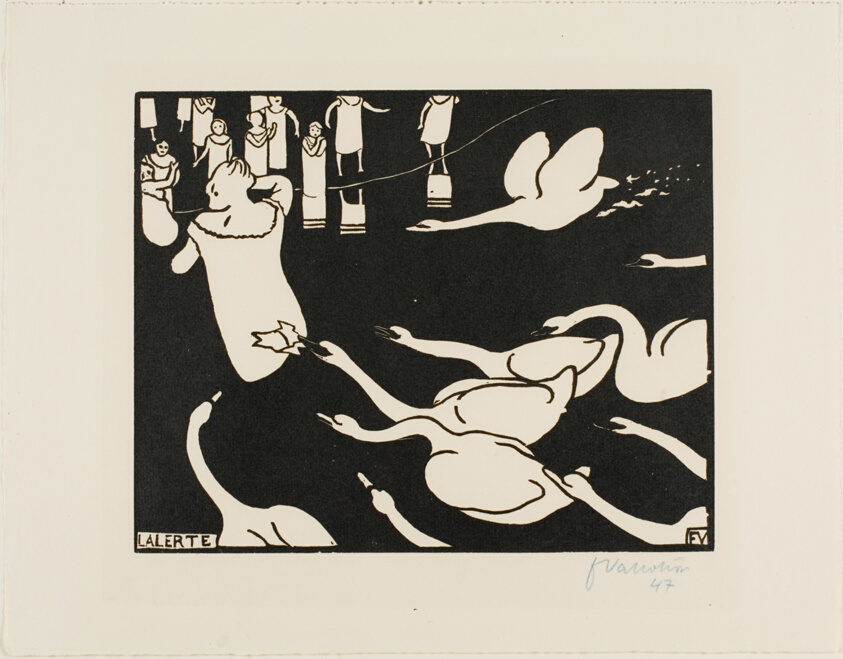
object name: Print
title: The Alarm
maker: Félix Edouard Vallotton (French, born Switzerland, 1865-1925)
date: 1895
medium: Woodcut in black on cream wove paper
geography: France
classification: woodcut; print; prints and drawing